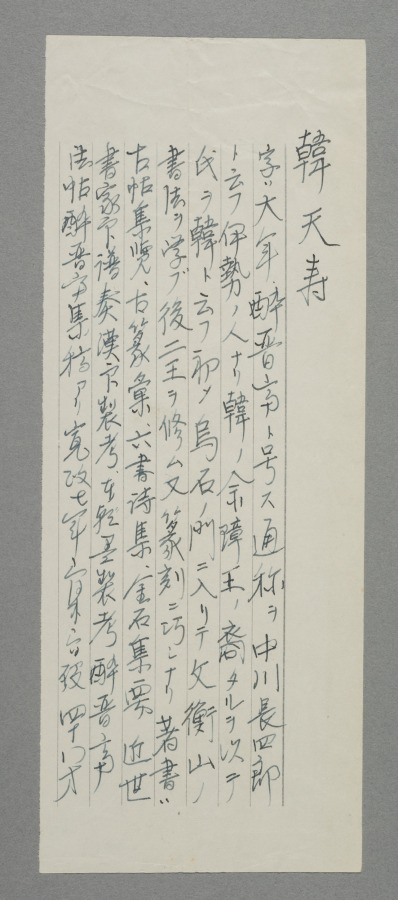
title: Landscape with Gentle Peaks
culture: Japan, Edo period (1615–1868)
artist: Kan Tenju (Japanese, 1727–1795)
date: 1767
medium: hanging scroll; ink and light color on paper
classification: Painting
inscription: 雨過嵐光煙／雲陽樹影諫／夕陽独在左／？卷讀残書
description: A figure sits in a retreat tucked into the mountains near a waterfall. The painter, Kan Tenju, was best known as a calligrapher and seal carver. Of Korean heritage, he was a patron of artist Ike Taiga (池大雅) (1723–1776), and a cousin of Taiga’s student Aoki Shukuya (青木 夙夜) (died 1802). His Chinese-style poem reads as follows: Smoky mist in the mountain reflects light after the rain, Sunlight passes through the clouds to cast shadows of the trees, Alone in the sunset, I read a well-worn book.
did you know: This painting combines image and calligraphy, connected by skillful brushwork.